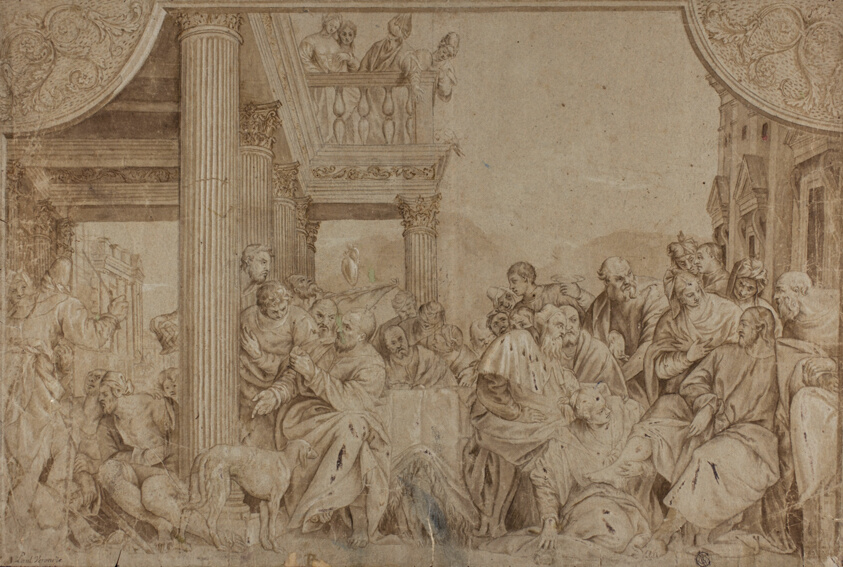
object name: Drawing and Watercolor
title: Christ in the House of Simon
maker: After Paolo Caliari, called Paolo Veronese; Italian, 1528-1588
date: c. 1700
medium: Pen and brown ink, with brush and brown wash, heightened with lead white (partly oxidized), over black chalk, on blue-gray laid paper, laid down on ivory laid paper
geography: Italy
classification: ink with wash; drawings (visual works); prints and drawing